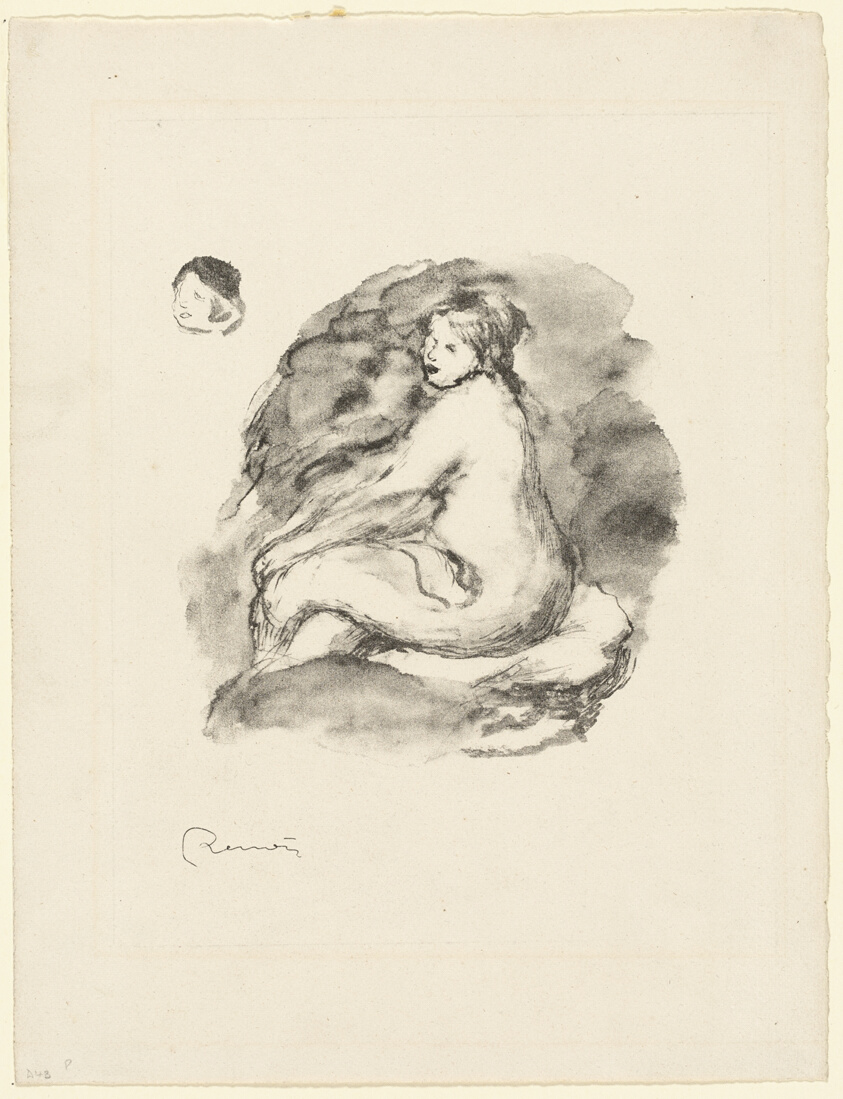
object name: Print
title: Study of a Seated Nude Woman, variant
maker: Pierre Auguste Renoir; French, 1841-1919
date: c. 1904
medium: Lithograph in black on off-white wove paper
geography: France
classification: lithograph; print; prints and drawing